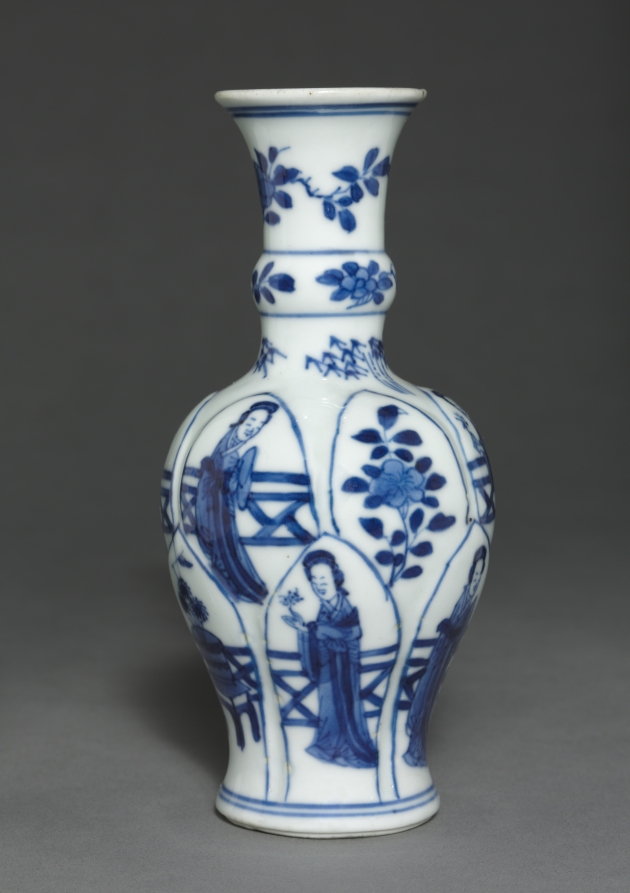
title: Vase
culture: China, Qing dynasty (1644-1911)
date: 19th Century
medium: porcelain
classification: Ceramic